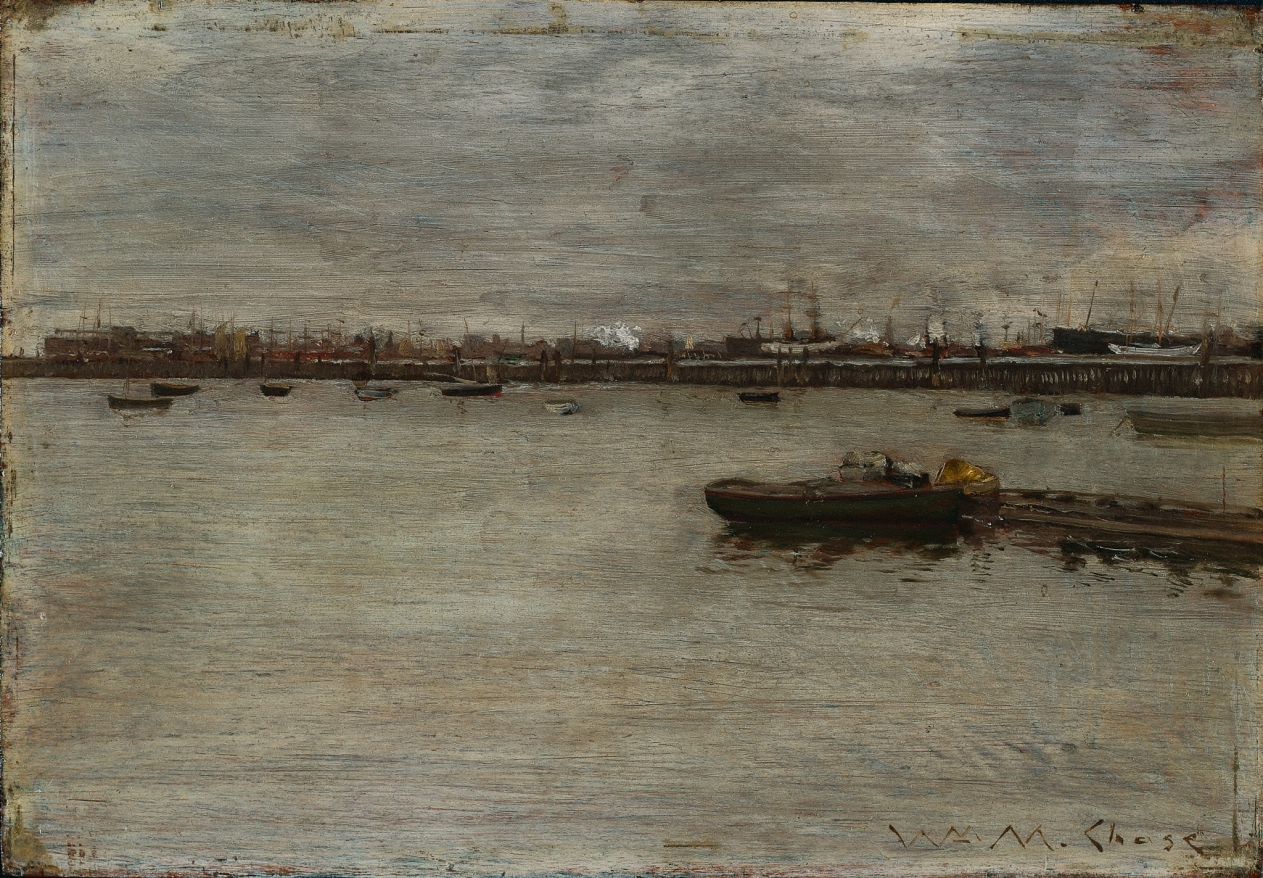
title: Gray Day on the Bay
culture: America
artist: William Merritt Chase (American, 1849–1916)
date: c. 1886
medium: oil on wood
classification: Painting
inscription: signed lower right: WM M. Chase [WM in monogram]